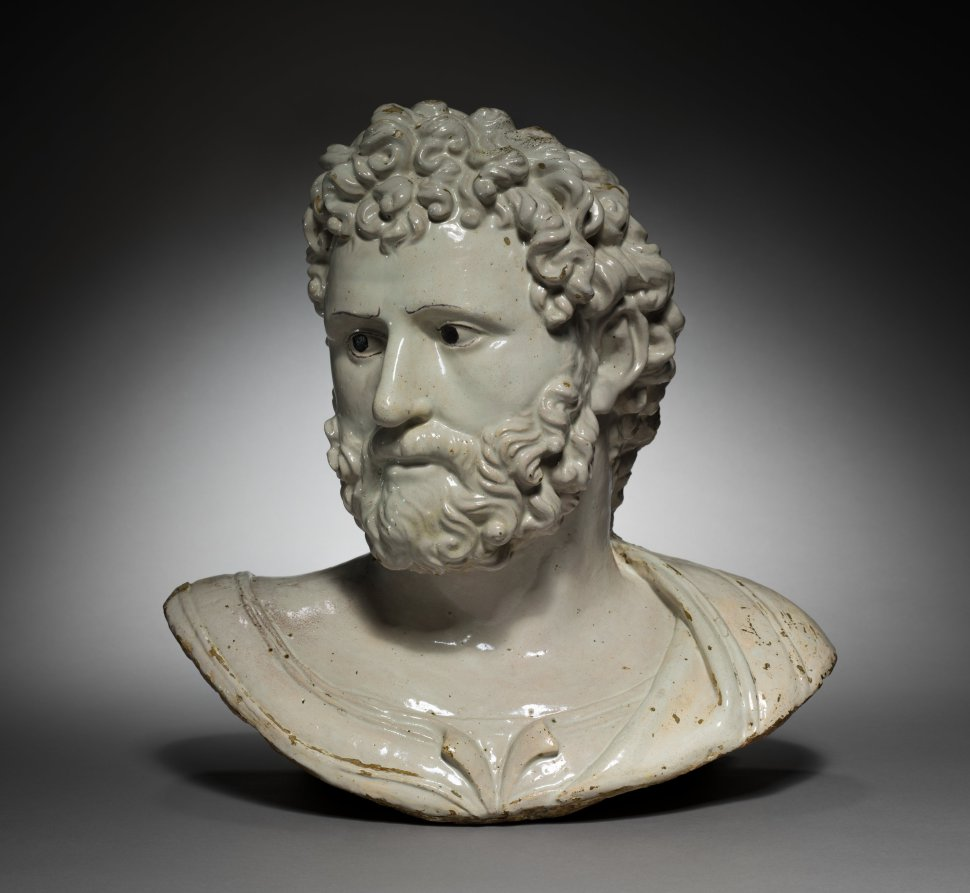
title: Bust of a Classical Hero or Emperor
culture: Italy, 16th century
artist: Girolamo della Robbia (Italian, 1488–1566)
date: early to mid 16th century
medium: glazed terracotta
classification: Sculpture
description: This bust most likely represents an emperor or condottiere from classical antiquity, and probably formed part of a series of classical heads. Such groups of worthies were featured as decorative schemes in the studioli and architectural projects of Renaissance statesmen. Attesting to the sophistication of their learned patrons, these busts also provided the opportunity for artists to explore the contemporary stylistic relevance of classical portraiture—a source of fascination and inspiration for Florentine sculptors of this period.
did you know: Head-and-shoulders portraits, known as busts, were popular from Roman times.